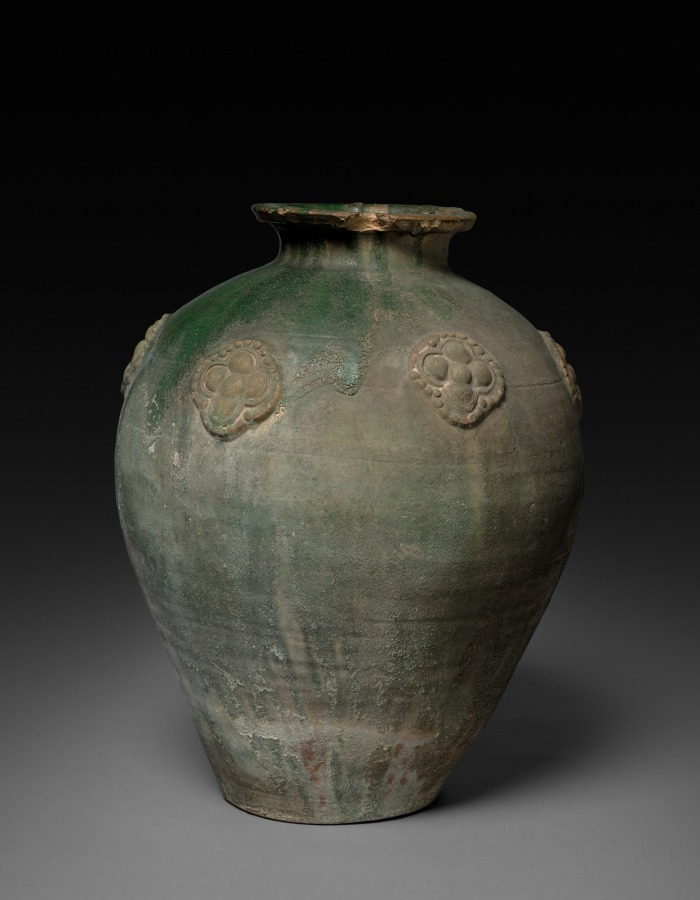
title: Jar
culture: China, Six Dynasties period (265-589) or Sui dynasty (581-618)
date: 500s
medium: glazed earthenware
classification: Ceramic